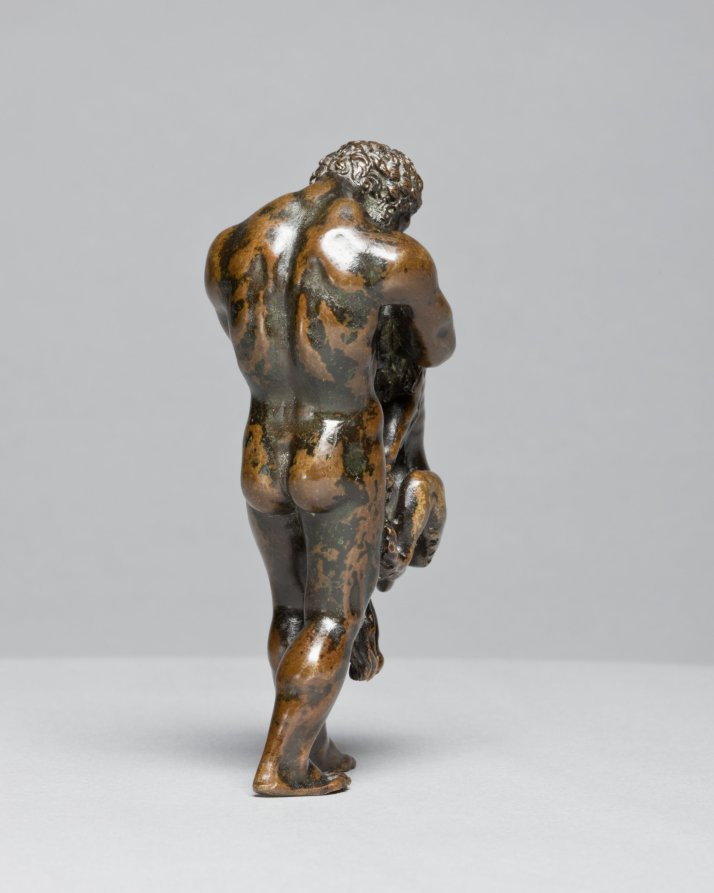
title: Hercules and the Nemean Lion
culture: Italy or France, 16th century or later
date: 1500s or later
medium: bronze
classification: Sculpture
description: The original owner of this work would have understood that this scene referred to the entire story of Hercules, the demi-god who had to accomplish twelve labors. The lion is named after the city of Nemea, near Corinth, a monstrous beast sent by the goddess Hera to wreak havoc on the area. After killing the lion, Hercules wore his pelt, commonly seen in other representations of the hero.